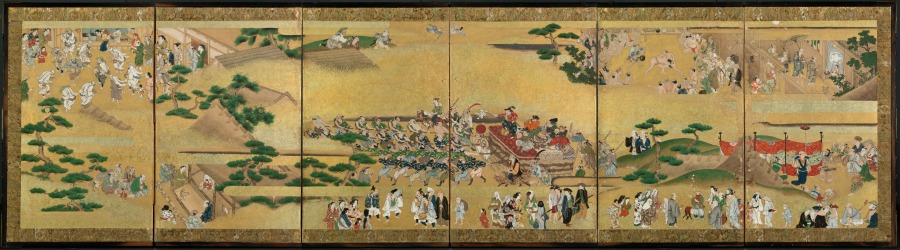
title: Festival Scenes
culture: Japan, Edo period (1615–1868)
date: 1615–99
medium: pair of six-panel folding screens; ink, color, gold, and gold leaf on paper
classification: Painting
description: Much smaller in size than standard Japanese folding screens, this lively pair depicts all manner of entertainments. Although at first they seem to show an ongoing festival, closer examination reveals that the screens comprise a series of isolated scenes from disparate occasions. In one screen, crowds gather around a bout of sumo wrestling as well as juggling and balancing acts. Elsewhere, teams of men pull a float bearing musicians costumed in foreign dress. There is also a dance circle with drums, a performing monkey, and a party of falconers. In the other screen, male courtiers observe a game of kickball played by noblemen, while their female counterparts watch from behind bamboo curtains. Others enjoy a theater performance. A children’s dance circle and a dance performance with ladies sporting elaborate headgear occupy the center of the screen. A group wielding huge parasols at the upper left of the screen reenacts episodes from legend, as still other performances, including dancing dogs, entertain the crowds below.